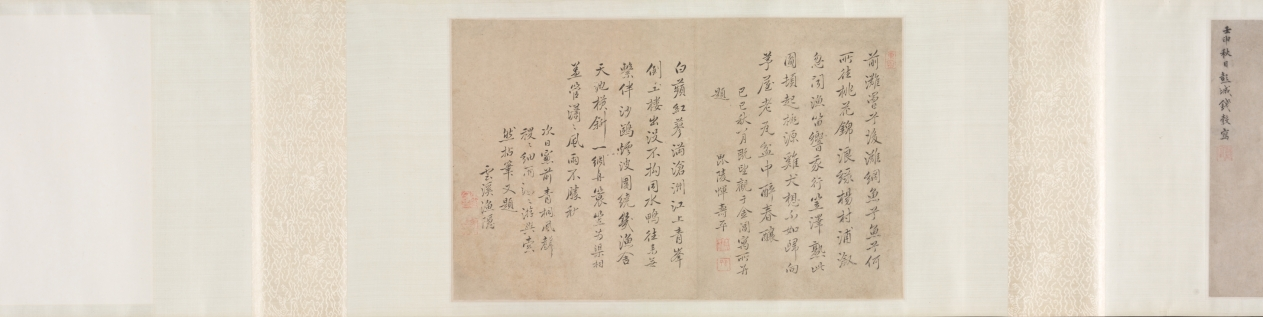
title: Fisherman's Joy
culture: China, Ming dynasty (1368–1644)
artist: Qian Gu (Chinese, 1508–c. 1578)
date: 1572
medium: Handscroll; ink and light color on paper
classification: Painting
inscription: Artist's inscription, signature, and seal: On the autumn day of the jen-shen year [1572], P'eng-ch'eng, Ch'ien Ku painted [this]. [seal] Hsüan-ch'ing shih. 2 colophons, both dated 1689, and 5 additional seals of Yün Shou-p'ing (1633-1690).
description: This painting has a scene showing two small crafts, each manned by two fishermen, practicing a traditional fishing method. In one of them, a man uses a bamboo pole to direct the movements of a cormorant bird sent into the water. Cormorant fishing, witnessed in some areas of the lower Yangzi River, appears in Zhe school paintings. Qian Gu may have borrowed these narrative figure scenes from Zhe school paintings, while his vantage point, brushwork, and soft tones align with the Wu school style. Scenes of fishermen appealed to urban and educated audiences who idealized the self-sufficient independence of fisherfolk.